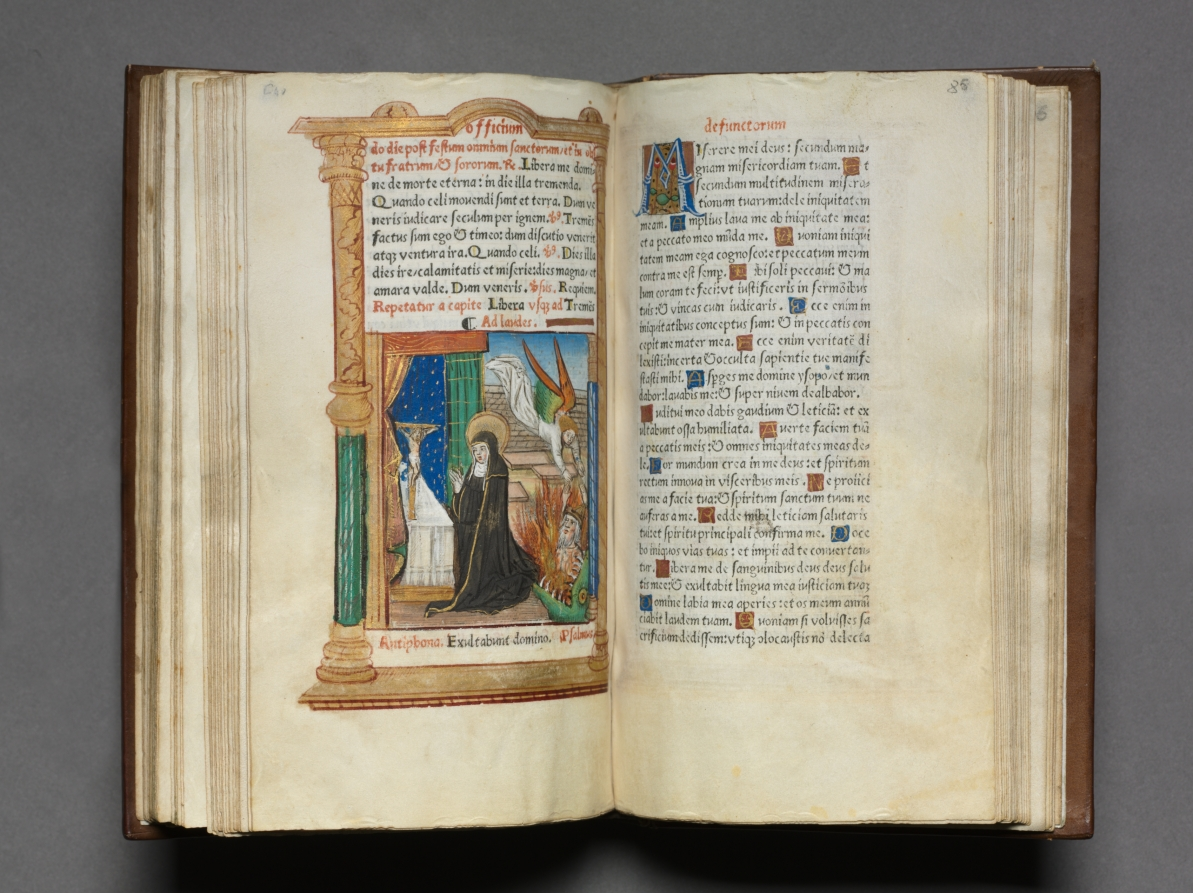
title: Printed Book of Hours (Use of Rome): fol. 84v, Dominican Nun in Prayer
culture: France, Paris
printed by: Guillaume Le Rouge (French, Paris, active 1493–1517)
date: 1510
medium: 112 Printed folios on parchment, bound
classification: Bound Volume